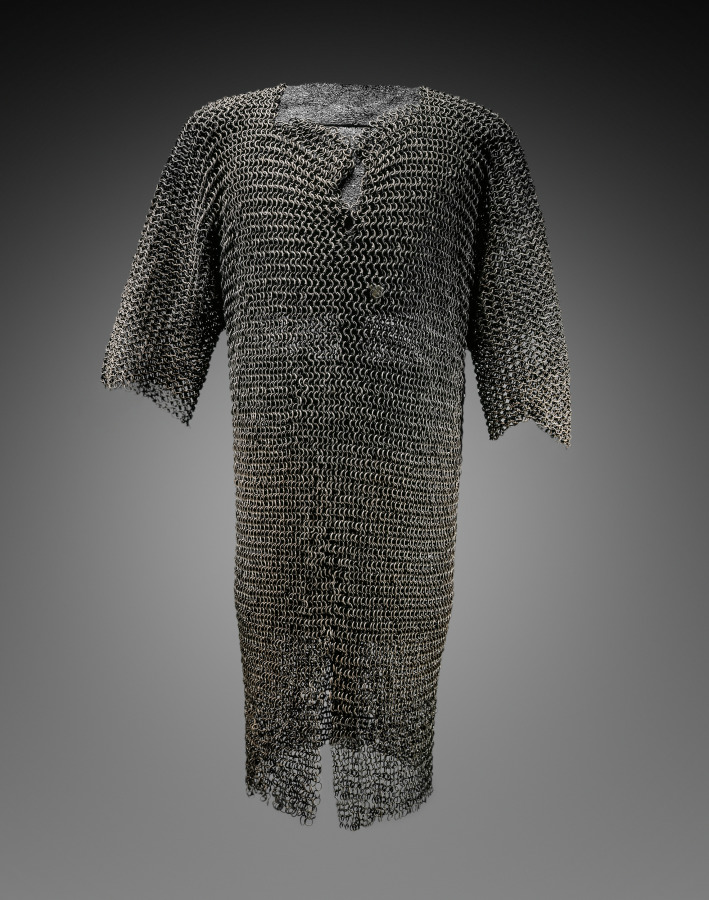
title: Hauberk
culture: Turkey (?), 15th century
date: 1400s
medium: riveted steel rings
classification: Arms and Armor